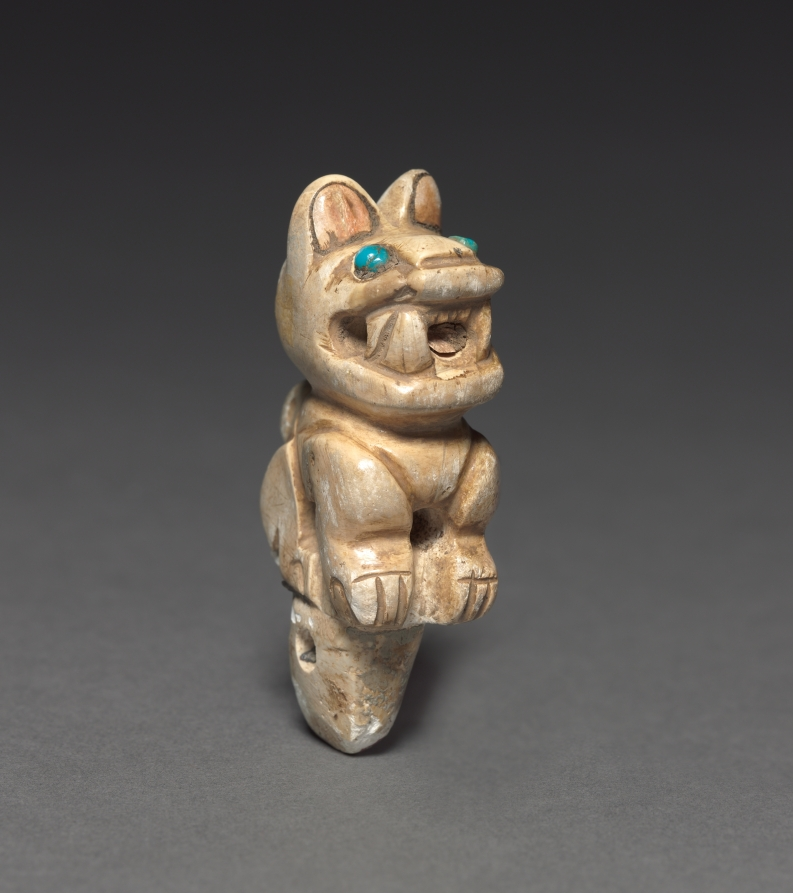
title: Crouching Feline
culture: Peru, Wari (?), 6th-10th Century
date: c. 500–900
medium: stone, turquoise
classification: Jewelry